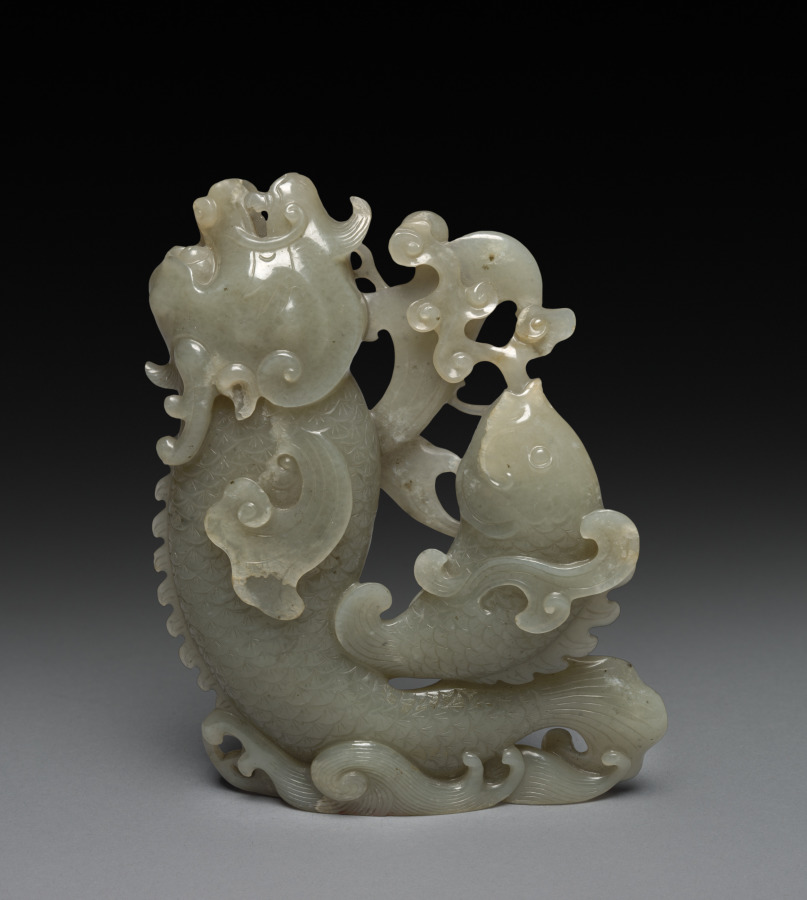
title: Leaping Carp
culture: China, Qing dynasty (1644-1911)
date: 1700s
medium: jade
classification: Jade